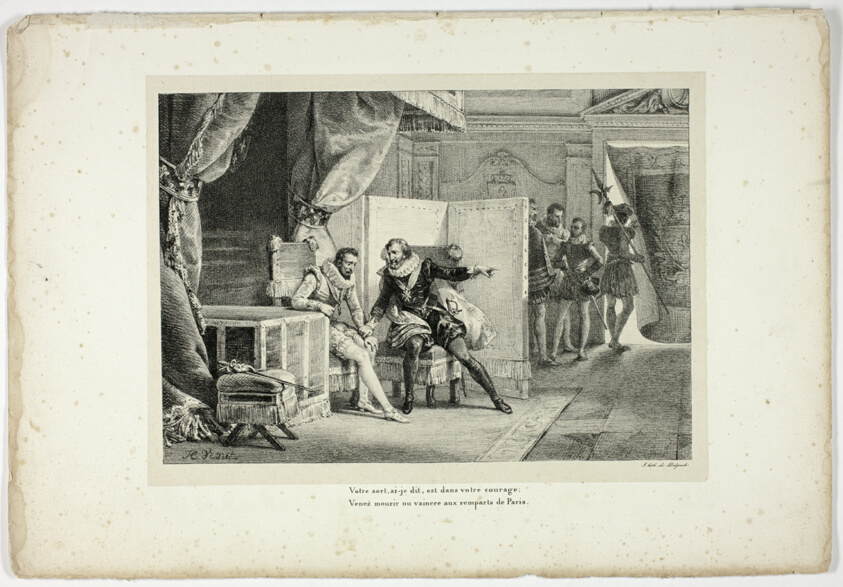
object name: Print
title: Votre sort, ai-je dit, est dans votre courage...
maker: Horace Vernet (French, 1789-1863); poem by Voltaire (French, 1694-1778); printed by Francois Seraphin Delpech (French, 1778-1825); published by Dubois (French, 18th-19th century)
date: 1825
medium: Lithograph in black on cream chine, laid down on ivory wove paper (chine collé)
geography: France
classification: lithograph; print; prints and drawing